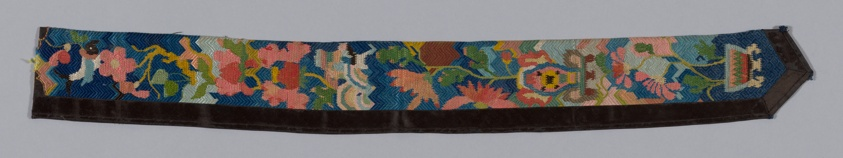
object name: Costume and Accessories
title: Band or Border (from Woman's Garment)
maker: China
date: 1875/1900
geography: China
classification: costume - needlework; needlework (visual works); costume